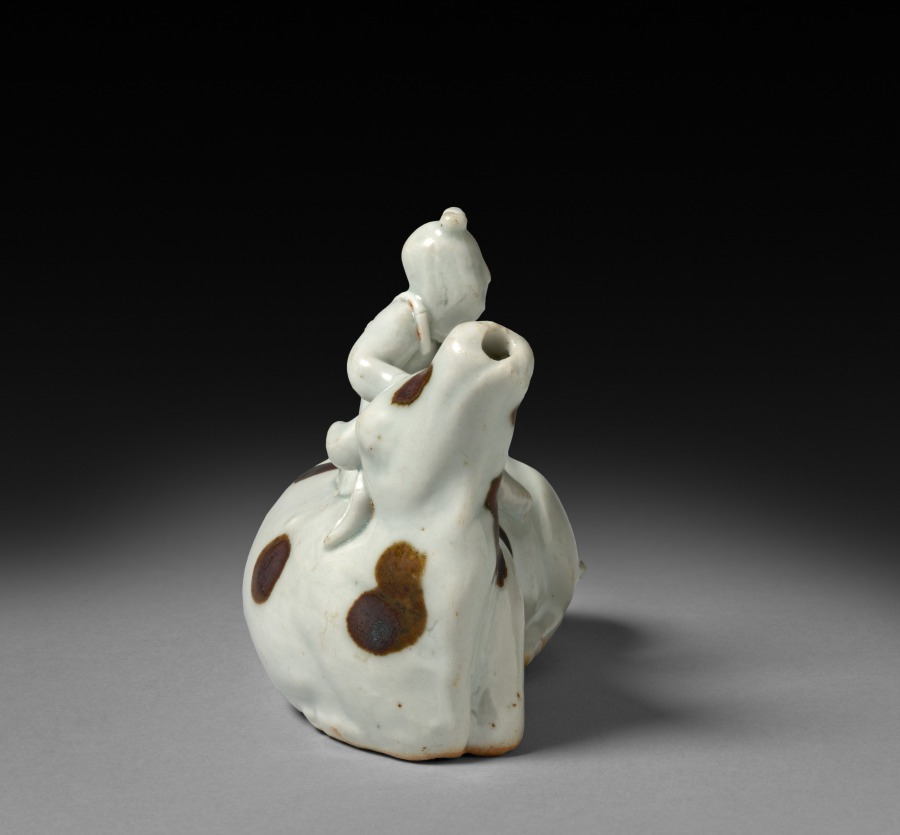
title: Buffalo with Rider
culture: China, Jiangxi Province, Jingdezhen kilns, Yuan dynasty (1271–1368)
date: early 1300s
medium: glazed porcelain with iron spots, qingbai ("blue-white") ware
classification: Ceramic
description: Boys tending buffalos were associated with a carefree life in the countryside free from the duties of officialdom. Water droppers contained water that was used to dissolve ink sticks into liquid ink for brush painting and writing.